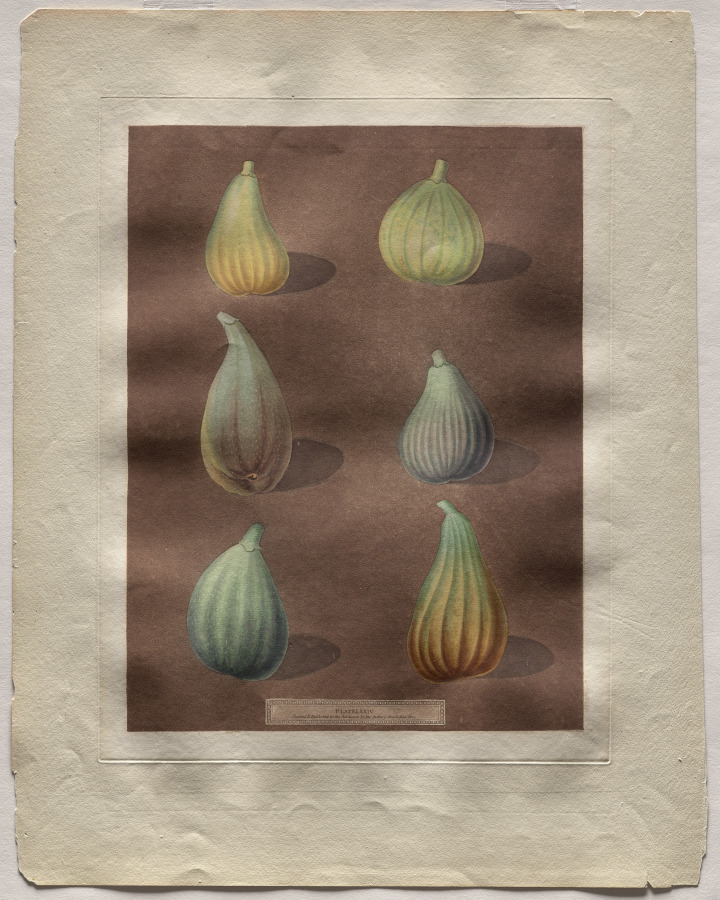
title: Pomona Britannica: No. 74 - Figs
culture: England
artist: Richard Brookshaw (British, 1736–1810)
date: 1807, published 1812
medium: aquatint and stipple engraving printed in color and hand colored on thick wove paper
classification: Print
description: This color aquatint etching is one plate from George Brookshaw’s 1812 illustrated volume Pomona Britannica. Named after the Roman goddess of fruit trees, gardens, and orchards, Brookshaw intended the volume to be the English “country gentleman’s” guide to the science of classifying and identifying fruits (pomology). Many of Brookshaw’s models came from the Royal Gardens at Hampton Court and Kensington Gardens. Each print featured one fruit, often life-size, including detailed depictions of its flower and leaves. Printed in color with hand-painted highlights, this and other illustrated botanicals formed an essential part of the cultured English library in the early 19th century.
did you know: Originally from the Mediterranean, figs were cultivated in England as early as the 1580s.